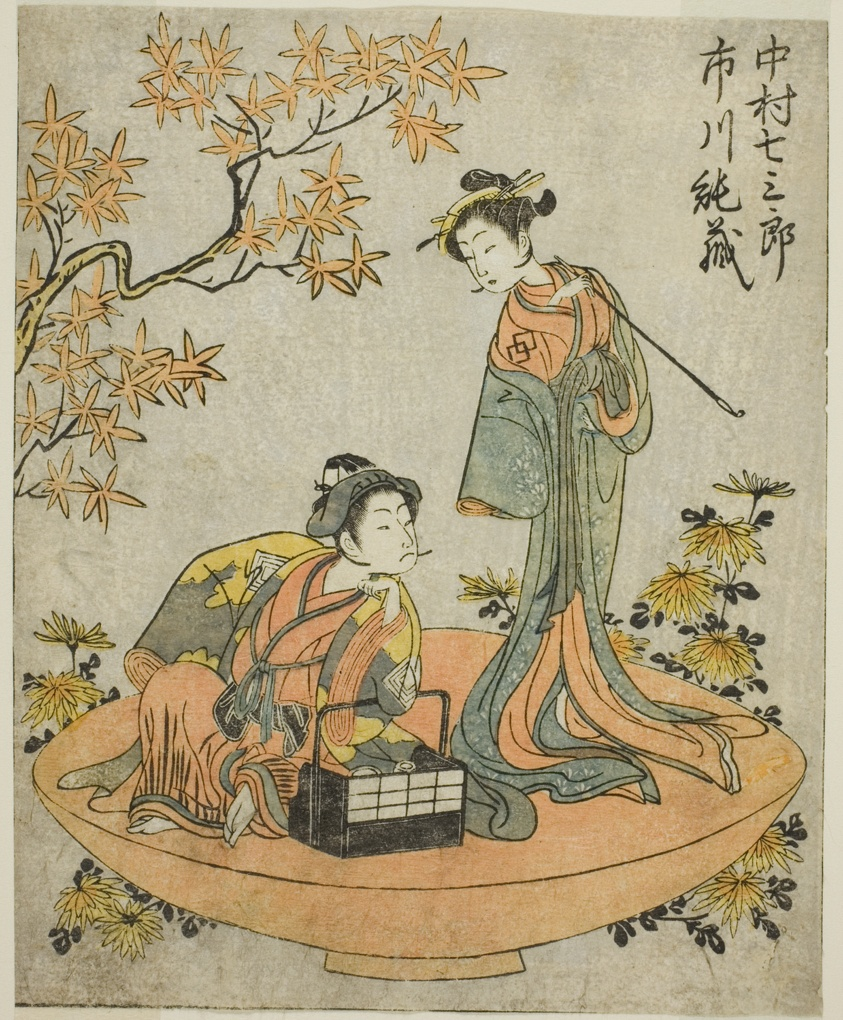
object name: Print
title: The Actors Nakamura Shichisaburo III (right), and Ichikawa Junzo I (left), in the Play Nue no Mori Ichiyo no Mato, Performed at the Nakamura Theater in the Eleventh Month, 1770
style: Japanese (culture or style)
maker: Katsukawa Shunsho 勝川 春章; Japanese, 1726-1792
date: c. 1772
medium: Color woodblock print; from the illustrated book Yakusha Kuni no Hana (Prominent Actors of Japan)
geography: Japan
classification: woodblock print; print; asian art